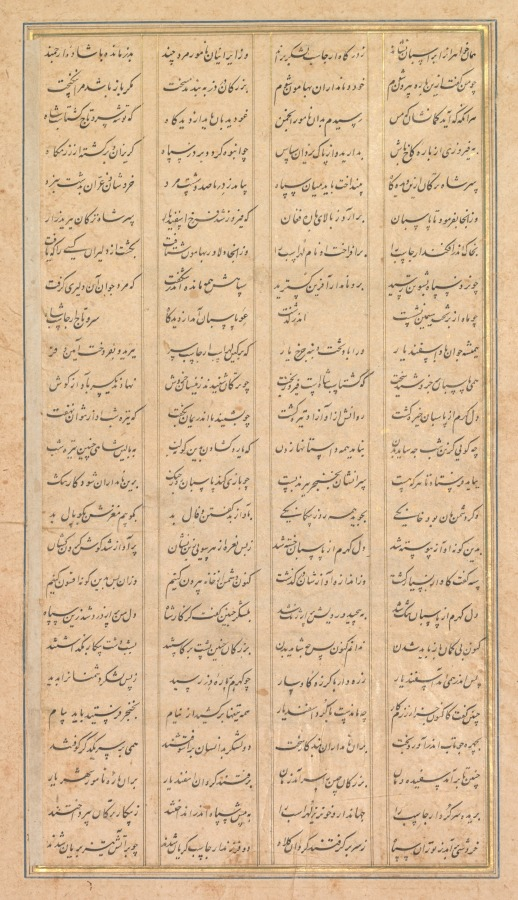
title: Isfandiyar slays Arjasp, the king of Turan, from a Shah-nama (Book of Kings) of Firdausi (Persian, about 934–1020)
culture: Mughal India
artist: Haidar Kashmiri (Indian, active late 1500s-early 1600s)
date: 1600–1605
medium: Gum tempera, ink, and gold on paper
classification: Painting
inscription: Persian inscription in left margin, in nasta‘liq script: 25 / Haidar Kashmiri; Persian title in nasta‘liq script: The Battle of Isfandiyar with Arjasp and The killing of Arjasp by the hand of Isfandiyar; Persian text in nasta‘liq script: He uttered these words, and hurried away from them Toward Arjasp’s court, bent on revenge He went forth, grasping a blade of Indian steel, Whomever of the notables his eyes fell on, was killed on the way So that in passing through the royal hall Hard it was to pick one’s way: So many wounded, battered, and dead Had turned the ground into a turbulent sea. When Arjasp awoke from his sleep His heart was troubled on hearing the din That he could not make out in the bedchamber. He put on his mail shirt and Roman-fashioned helmet Clutching in hand a burnished dagger, He shouted loud, blood coursing through his heart. The warrior Isfandiyar confronted him. They fought beyond measure and scale, Exchanging daggers and swords in a furious feud At times targeting the head, at times the waist, To him he (Isfandiyar) said, “Now from the tradesman Will you receive the gift of a blade, one glittering like a silver denarius. I have it as a gift for you, worthy enough to come from Luhrasp, inlaid with Gushtasp’s seal. He made Arjasp go limp and lifeless by the delivered cuts Nowhere on his body did he leave untouched. His mammoth body toppled over His head severed from the body by Isfandiyar. Such is the conduct of the revolving fortune: At times it offers us a honeyed potion, at others a deadly poison Why tie your heart to this transient place Since you know that you will not stay forever, do not grieve and pine. Having dealt with Arjasp, Isfandiyar Gutted the palace, its smoke reaching as far as Saturn He ordered torches lit Setting fire to the palace from all sides He entrusted his (Arjasp’s) women’s quarters to a eunuch, Taking all luster away from the place. He sealed off the treasury No one in Turan was now equal to his fight. He went to the stables and mounted A blade of Indian steel in his hand He selected among the Arab horses there And ordered them saddled A hundred and sixty men rode away from there Handpicked riders for the day of battle.; Verso: Text of Isfandiyar slays Arjasp, the king of Turan: Persian inscription in bottom margin, in nasta‘liq script: The army realized Persian text in nasta‘liq script: [cont. from recto] He furnished mounts, moreover, for his sisters, And marched forth from the court-gate of Arjasp, But left a few Iranians, men of name, With noble Sawa in the hold. “When we,” He said, “have gone outside the walls, I and my noble warriors, to the plain, Secure the gate against the Turkman troops, And may my good star aid me. When ye think That I have joined our noble troops outside, Then—let the watchmen from the lookout cry: ‘Blessed be the head and crown of Shah Gushtasp.’ And when the Turkman troops come toward the hold, In flight retreating from the battlefield, Then you shall throw the head of King Arjasp Before them from the tower of the watch.” The valiant hero rushed upon the plain, And slaughtered all the Turkmans that he found. As he approached the troops of Bishutan They saw and praised him in amazement that he, Who was so young, should show such bravery. When the moon had left her silver throne, And when three watches of the night had passed, The watchman shouted lustily, proclaiming: “Gushtasp, the Shah, has gained the victory, And may Isfandiyar be ever young. May heaven, moon, and fortune be his helpers, Who has in vengeance for Luhrasp beheaded Arjasp and, adding luster to our Grace And customs, cast him down from throne to dust, And made the name and fortune of Gushtasp Resplendent.” Hearing such a cry the Turkmans All listened while Kuhram grew dark of heart By reason of that watchman, was astonished, And spoke thus to Andariman: “How clear This cry is in the night! What do you say Can be the cause? Let us consult, for who Would dare to bawl thus by the monarch’s couch And after dark? What tricks might such a one Play in the day of battle, and thus bring Our nobles into straits! So send and have His head cut off, whoever he may be. If one of our own household is our foe, And he is backing up our enemies. “With evil words and evil presages, Then will we brain him with an evil mace.” Now when the cry went on persistently Kuhram was stricken to the heart with anger Against the watchman whose utterance, spread abroad In such a fashion, filled the nobles’ ears. The soldiers said: “The shouts increase, beyond A watchman’s! Let us drive the foemen forth And after take this host” Kuhram, who was straitened At heart about that watchman, writhed and frowned. He told the troops: “These men have filled my heart With dread about the king. We must return At once, past question. What may happen after I know not.” So that night they left the field, Where Isfandiyar, with ox-head mace And wearing mail, pursued them. When Kuhram had reached The portal of the hold, and saw the Iranians Pursuing, “What is left us,” he exclaimed: “But to fight with brave Isfandiyar? Unsheathe and send your message by the sword.” But fortune frowned and those famed chiefs fared ill. The two hosts raged and smote each other's heads Till morning came, and then the chiefs of Chin Had had their day. Ascending to the ramparts The warriors of Isfandiyar inside The hold flung down therefrom the severed head Of brave Arjasp—the king that had slain Luhrasp. The Turkmans fought no longer; from their host Arose a cry, and all the troops unhelmed. The two sons of Arjasp wept and were consumed As in a fierce fire, while all the army knew What they must weep for on that evil day. (closely adapted from Warner and Warner 1912, 152)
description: This illustrated scene occurs early in the narrative of Isfandiyar, who is destined to serve as king of Iran with Rustam as his champion. The episode describes Isfandiyar’s quest for vengeance against the tyrant Arjasp of Turan, who had defeated his father in battle and taken his sisters captive. Isfandiyar disguised himself as a merchant, entered Arjasp’s fort, and then fought his way to the enemy king, whom he defeated in battle. The artist has included beautiful and delicate details of the garden and architectural setting of this gruesome scene. An onlooker below puts his finger to his mouth in a gesture of astonishment.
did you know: Wine spilling from a porcelain bottle heightens the action of the moment.